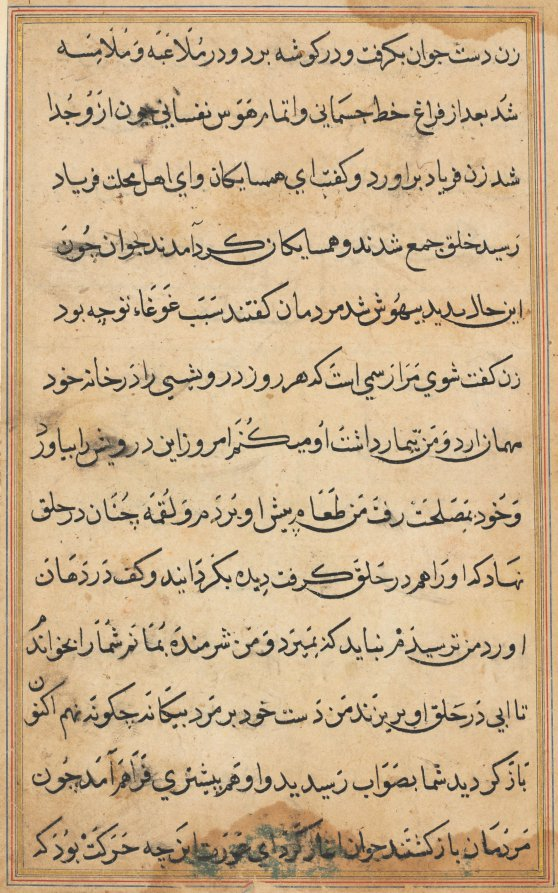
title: Page from Tales of a Parrot (Tuti-nama): text page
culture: Mughal India, court of Akbar (reigned 1556–1605)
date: c. 1560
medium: gum tempera, ink, and gold on paper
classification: Painting